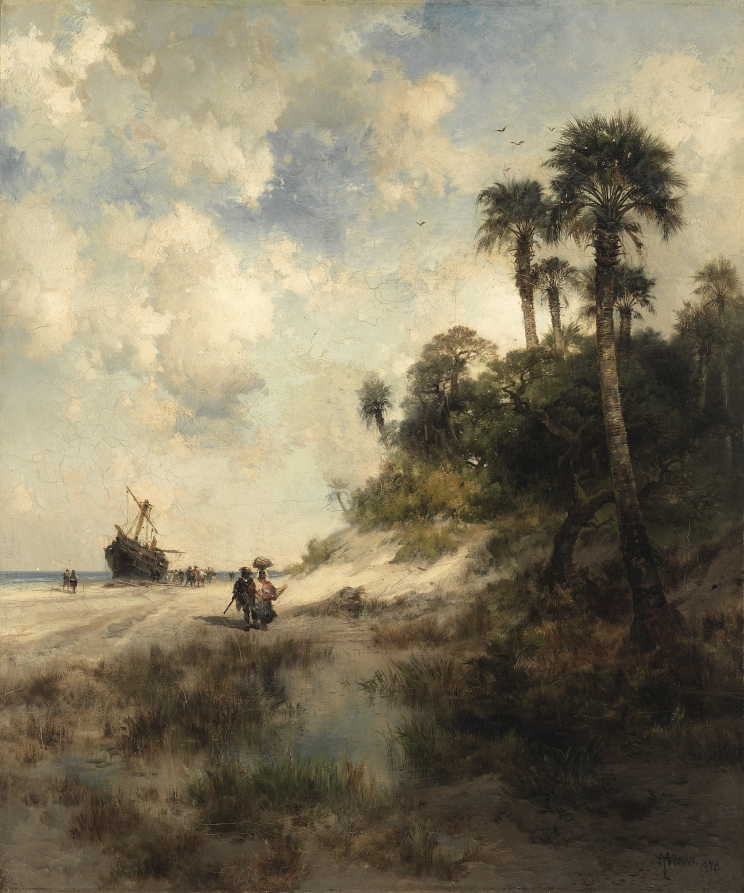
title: Fort George Island, Florida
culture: America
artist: Thomas Moran (American, born England, 1837–1926)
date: 1878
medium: oil on canvas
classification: Painting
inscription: signed lower right: TMORAN / TMORAN. 1878 [TM in monogram].